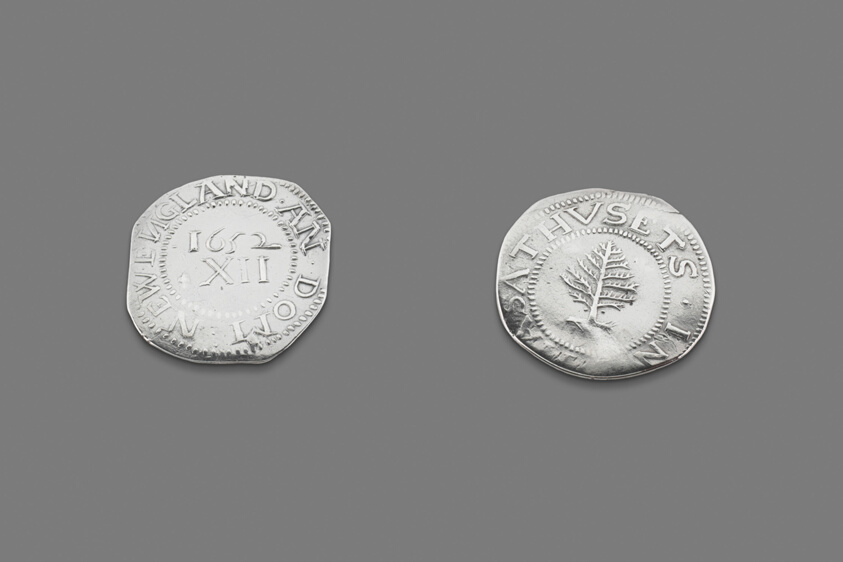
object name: Coin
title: Pair of Pine Tree Shillings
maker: John Hull; American, born England, 1624–1683; Robert Sanderson; American, 1608–1693; Boston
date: 1663–82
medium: Silver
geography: Boston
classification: coin; silver; american decorative arts; american arts; decorative arts